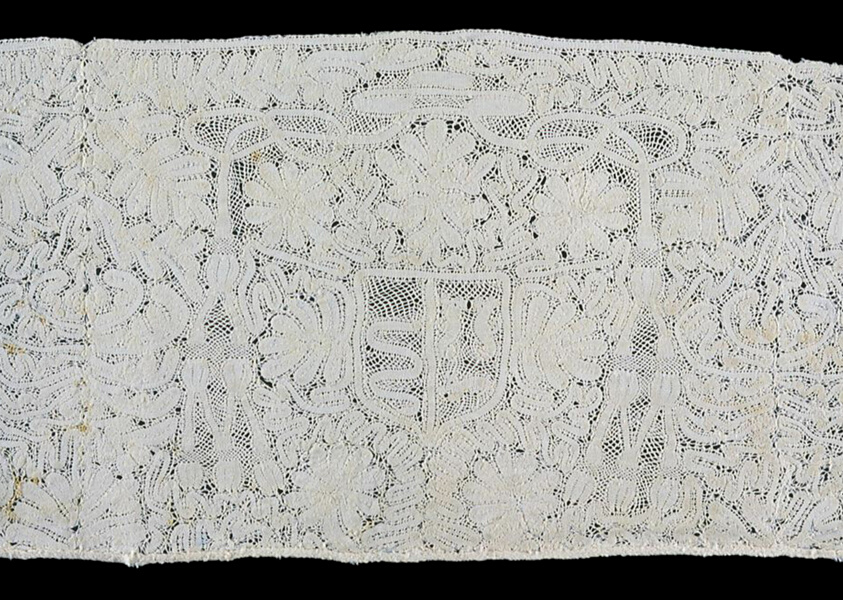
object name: Textile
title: Insertion with Cardinal's Coat-of-Arms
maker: Italy, Milan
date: 1675/1725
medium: Linen, bobbin part lace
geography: Italy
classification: textile; lace - bobbin